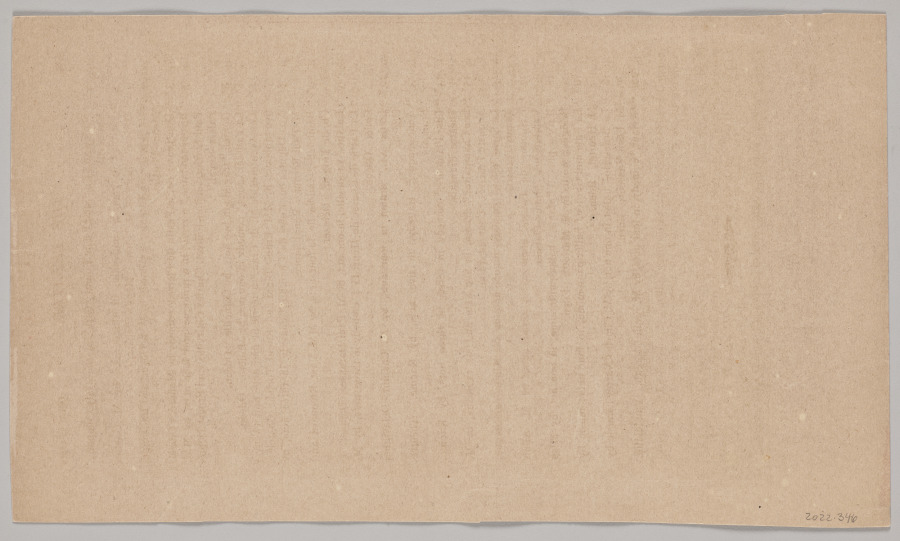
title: "A Run of Luck," at Drury Lane Theatre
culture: England, 19th century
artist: Herbert Rose Barraud (British, 1845–1906)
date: 1886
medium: woodburytype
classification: Photograph